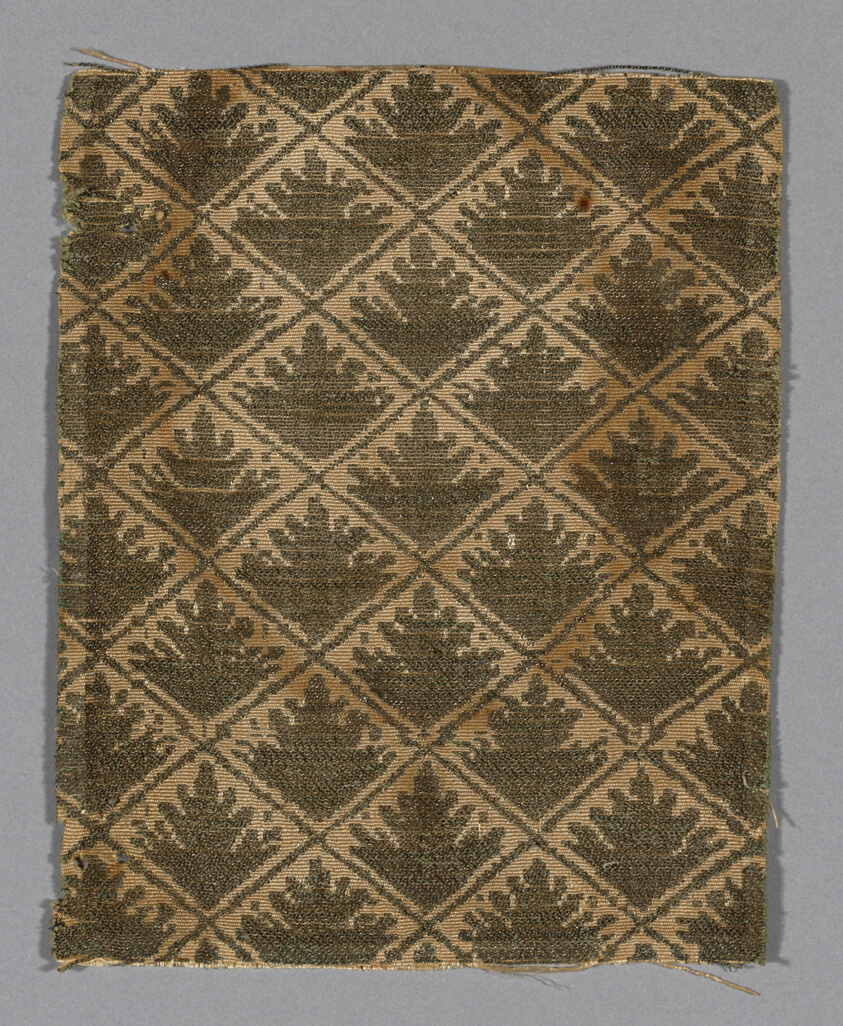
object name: Textile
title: Fragment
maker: Italy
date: 17th century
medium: silk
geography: Italy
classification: textile; weaving